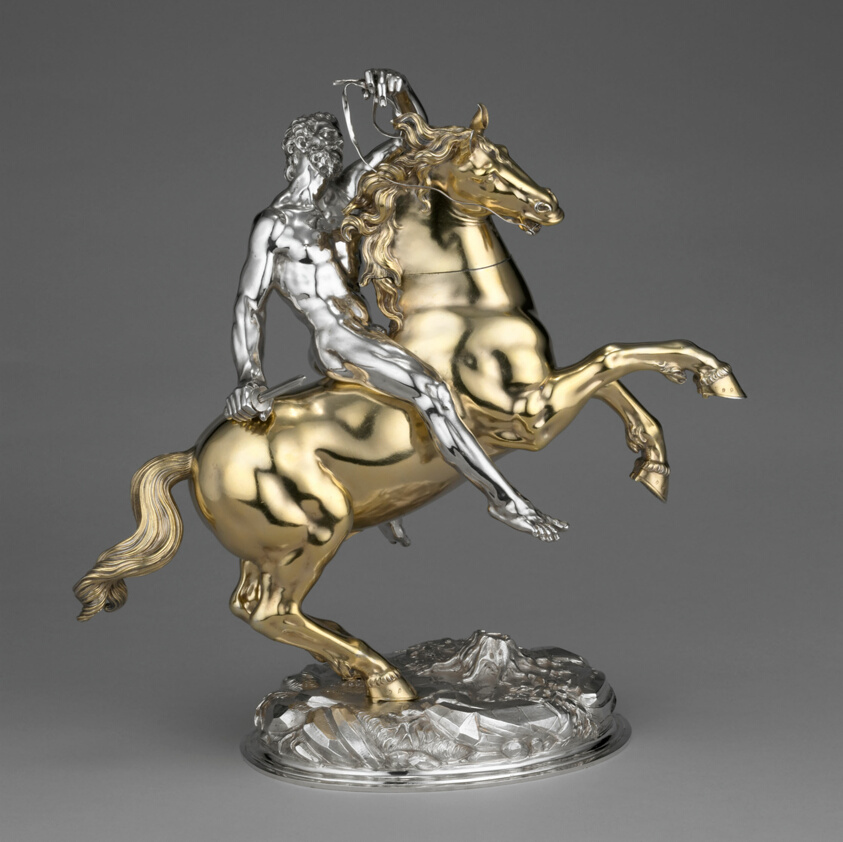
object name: Metalwork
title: Horse and Rider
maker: Hans Ludwig Kienle; German, 1591–1653; Ulm, Germany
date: 1630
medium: Silver and silver gilt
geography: Ulm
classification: statuette; european decorative arts; silver; metalwork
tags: men, horses, warriors, nudity